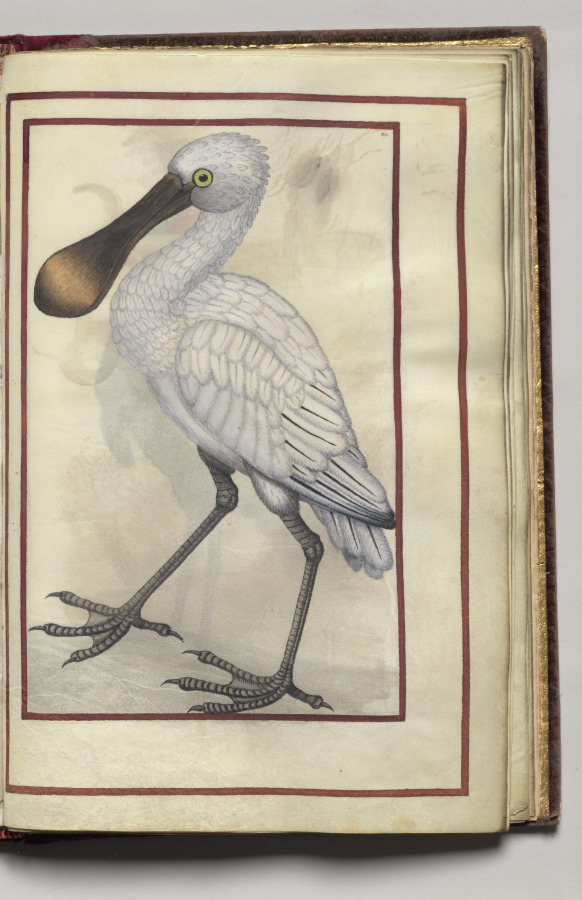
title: White Bird, folio 35 (recto), from Florilegium (A Book of Flower Studies)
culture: France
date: 1608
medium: watercolor, ink, silver, and gold over occasional traces of pencil, on vellum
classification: Bound Volume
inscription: Dated: Poitiers 1608 (on frontispiece) Signed: On frontispiece in black ink, lower right: Van Kuyk Notation on drawing: Frontispiece: in pencil, lower margin: * élève de Van Kessel, peintre flammand (* in pencil also appears in front of Van Kuyk's name).